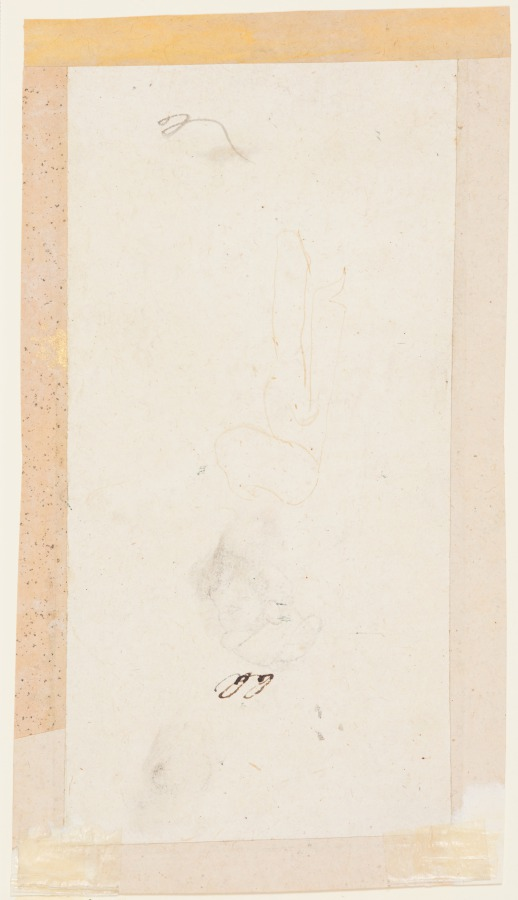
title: Royal Woman Holding a Flower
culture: Northwestern India, Rajasthan, Rajput Kingdom of Bikaner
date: c. 1670s–80s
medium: gum tempera and gold on paper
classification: Painting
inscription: 77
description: Following the model of formal imperial Mughal court portraiture, the artist has lavished care on shading the face of a royal woman and the distinctive qualities of her luxurious textiles. Details have been exquisitely rendered, including the fringe of her pink shawl with its lotus vine border and the sprigs of flowers tucked in her hair.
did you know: The flowering plants on the ground echo the lush vegetation of the Qur'anic paradise.